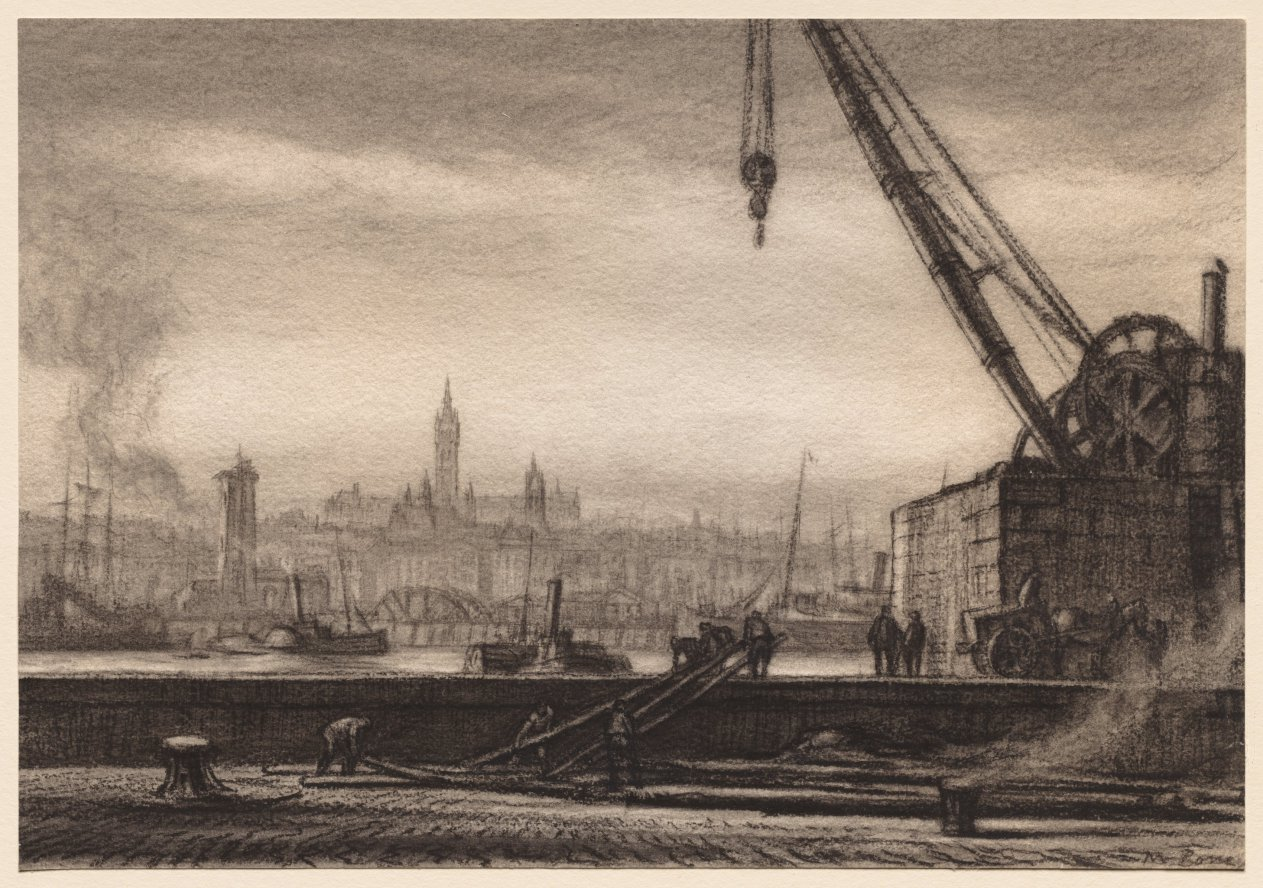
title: Glasgow University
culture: England, 20th century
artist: Muirhead Bone (British, 1876–1953)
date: c. 1896–1916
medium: charcoal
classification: Drawing